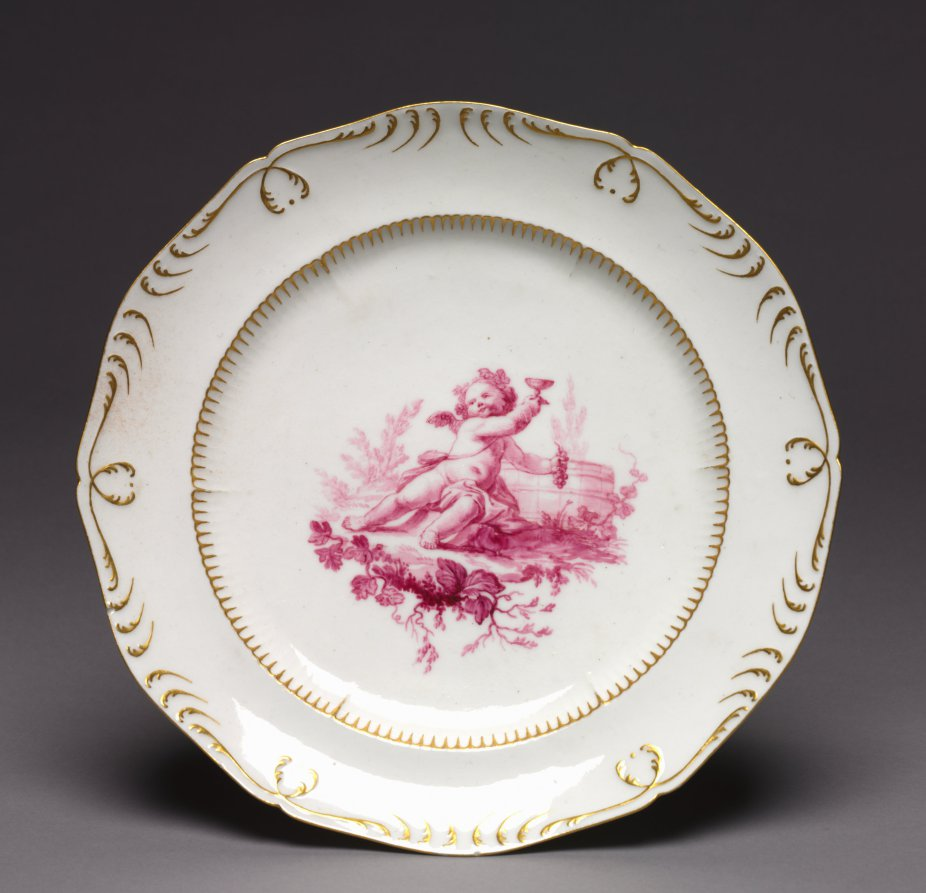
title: Plate (Assiette à cordonnet)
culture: France, Sèvres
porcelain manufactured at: Sèvres Porcelain Factory (French, est. 1756)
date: c. 1752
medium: soft-paste porcelain with enamel and gilt decoration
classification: Ceramic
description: The paintings and designs of François Boucher were reproduced regularly at the Vincennes Porcelain Factory. This image of Bacchus, the Roman god of wine and revelry, depicted on this plate in the form of a winged cupid, was likely inspired by Boucher’s models. Representations of children in monochromatic color schemes, as seen here, were known in France as enfants camïeux and popularly decorated 18th-century French porcelain.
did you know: Madame de Pompadour, official mistress of French King Louis XV, bought 36 plates with this form and type of decoration on May 23, 1753, attesting to its popularity among French royals.